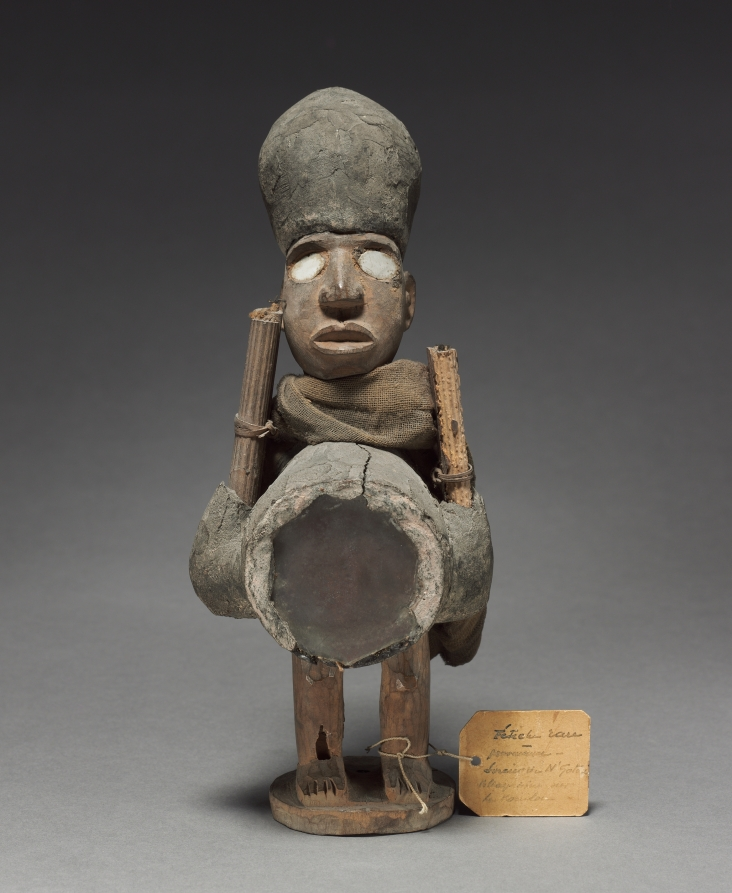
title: Power figure (nkisi)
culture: Africa, Central Africa, Republic of the Congo, Kongo-style maker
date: late 1800s–early 1900s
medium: Wood, organic materials (including resin), cloth, metalized glass, possibly porcelain, and plant fiber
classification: Sculpture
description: This figure is one of the two tallest of the seven anthropomorphic minkisi figurines previously in the Delenne collection. Identified as an nduda, two upward “guns” are attached on its side loaded with gunpowder used to shoot witches. Its label bears the word colique, a term referring to heavy pains caused by intestinal obstruction.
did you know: The object’s two small guns are pointing upward, but bears the label “colique,” a term referring to heavy pains caused by intestinal obstruction.